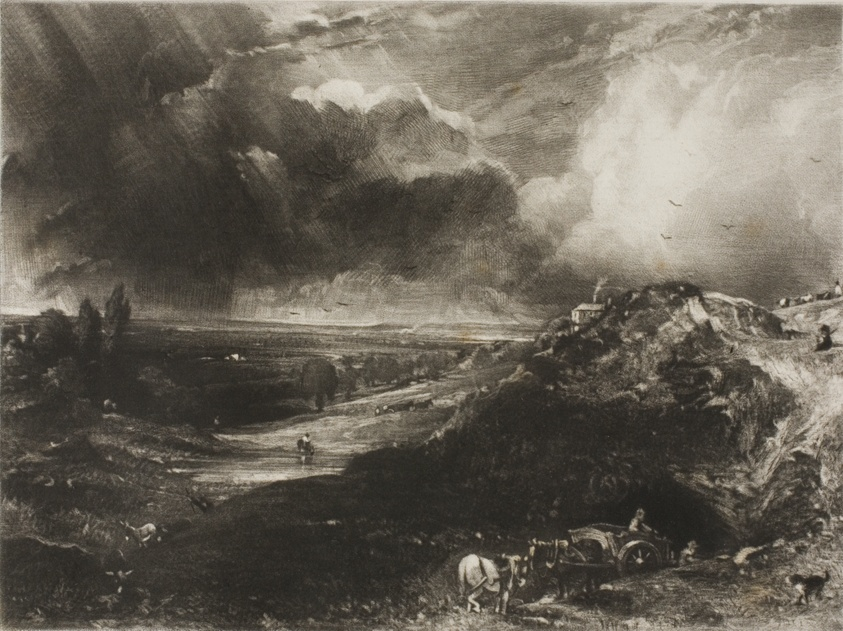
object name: Print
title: A Heath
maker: David Lucas (English, 1802-1881); after John Constable (English, 1776-1837)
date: 1831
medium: Mezzotint on paper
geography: England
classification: mezzotint; print; prints and drawing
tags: landscapes